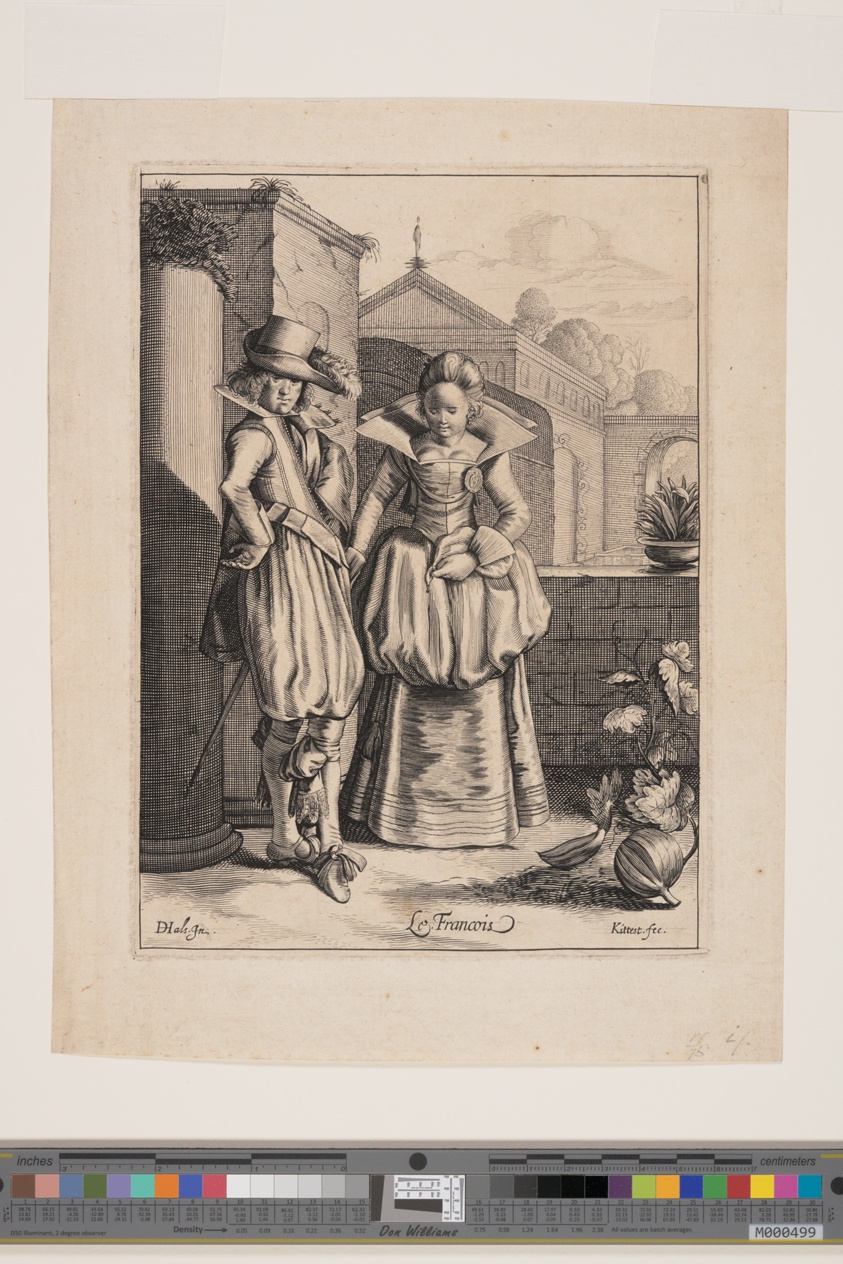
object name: Print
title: Le François (The French)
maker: Cornelis van Kittensteyn (Dutch, c. 1598–c. 1652); after Dirck Hals (Dutch, 1591-1656)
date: c. 1620-40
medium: Engraving on ivory laid paper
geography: Netherlands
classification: engraving; paper; print; prints and drawing